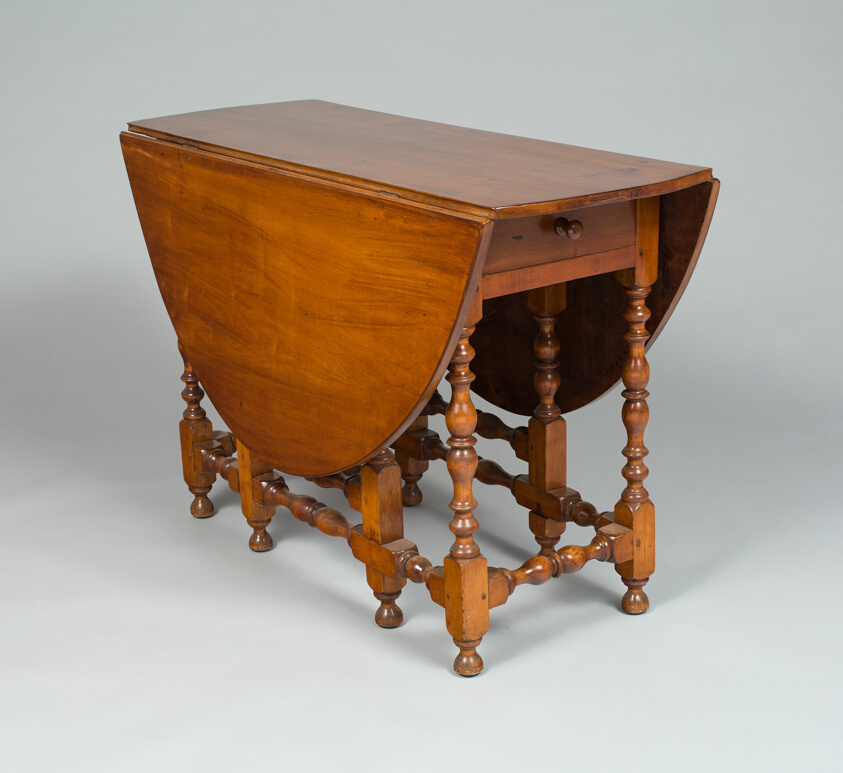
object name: Furniture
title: Table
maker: Artist unknown (American, 17th–18th century); New England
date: 1690–1730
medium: Maple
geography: New England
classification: table; furniture; american decorative arts; american arts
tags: furniture